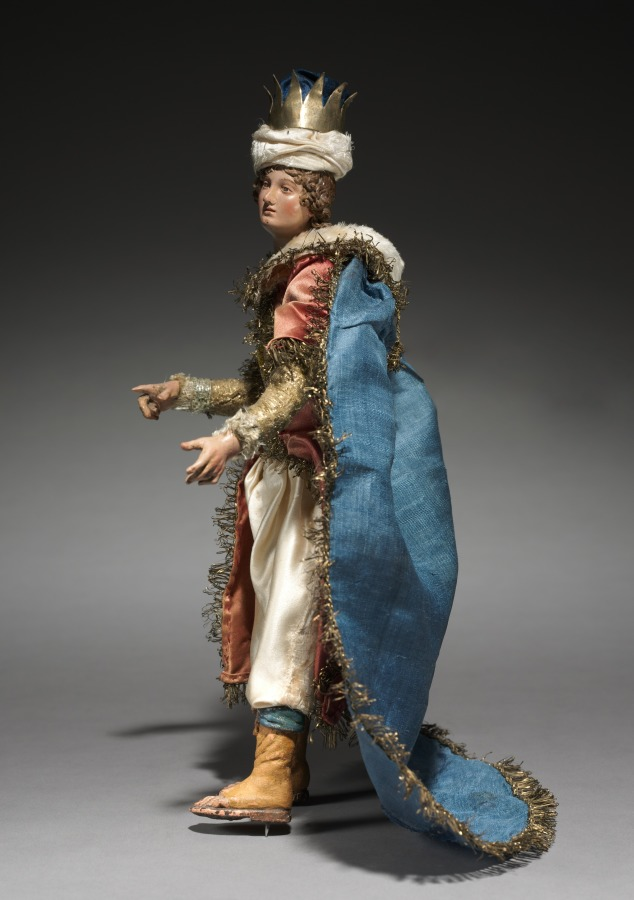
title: Figure from a Crèche: Youthful Magus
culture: Italy, Naples, late 18th-early 19th century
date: 1780–1830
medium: painted wood and terracotta with various textiles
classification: Sculpture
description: The practice of creating scenes of the Nativity for the home dates from the early 1700s in Italy, where people began to set up doll-like figures of about a foot or less in height. The custom was particularly popular in Naples around 1800, where crèche scenes (crèche means cradle, or crib) included many figures, whose heads and hands of painted terracotta, stuffed cloth bodies, and clothing adapted from contemporary local costumes gave them an amazingly realistic character. Representations of the birth of Jesus can be traced to the first few centuries of Christianity. Both living creatures and sculptural depictions of them were used from early times. By the late middle ages it was customary to create life-size figures of wood or stone, naturalistically painted, to represent the characters who participated in the events of Jesus's early life. These sculptures were then arranged in scenes illustrating one or both of the most important of these events, the Adoration of the Shepherds and the Adoration of the Magi-the three kings from the East who came to pay homage to the Christ child. Used in churches, these large figures were especially popular in Italy, Central Europe, Spain, and Portugal.